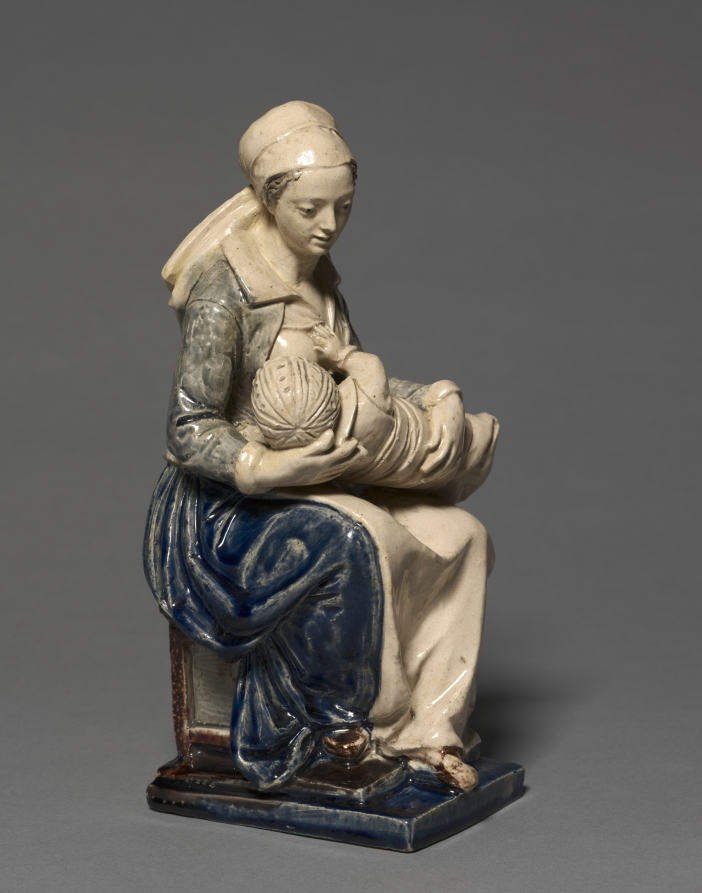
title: Figure of the Nurse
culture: France, 17th century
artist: attributed to Claude Bertélémy de Blénod (French)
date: early 1600s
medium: faience with enamel decoration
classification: Ceramic